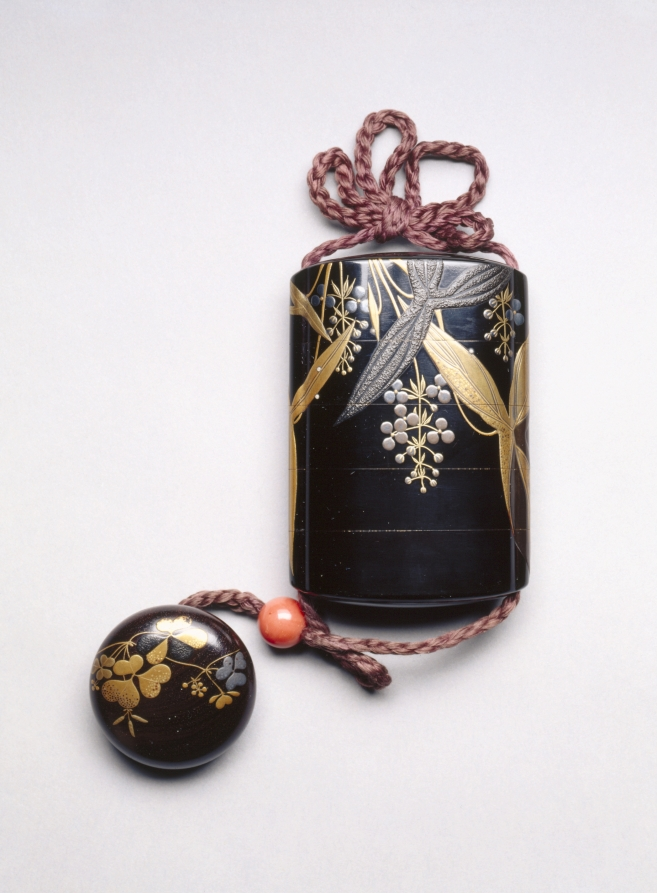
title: Inro, Ojime, Netsuke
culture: Japan, Edo period (1615–1868) to Meiji period (1868–1912)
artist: Shibata Zeshin (Japanese, 1807–1891)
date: later 1800s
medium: lacquer with sprinkled gold, silver, and mother-of-pearl design, coral, and wood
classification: Lacquer